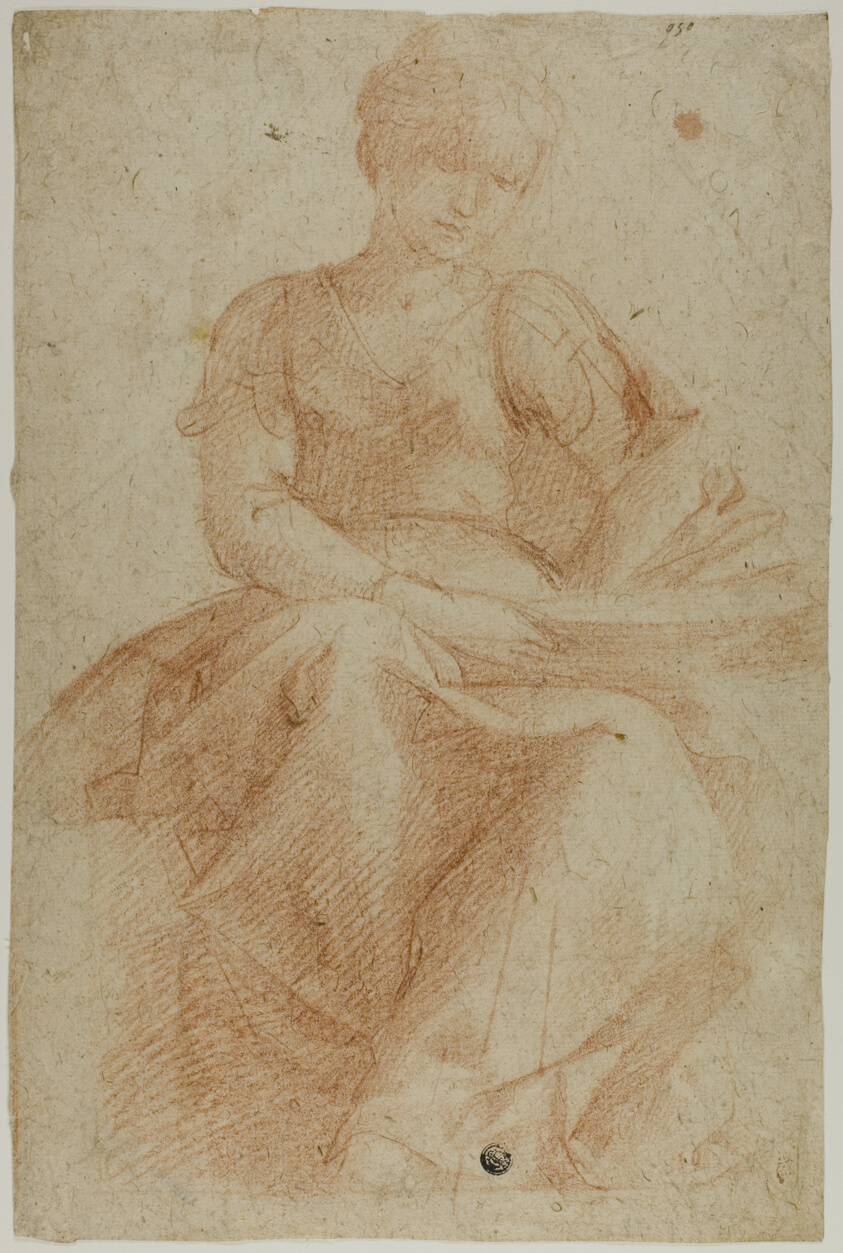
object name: Drawing and Watercolor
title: Seated Woman with Book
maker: Probably Domenico Fiasella (Italian, 1589-1669); or possibly the circle of Matteo Rosselli (Italian, 1578-1650); or possibly Lodovico Carracci (Italian, 1555-1619)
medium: Red chalk on tan laid paper, laid down on gray laid paper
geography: Italy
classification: chalk; drawings (visual works); prints and drawing